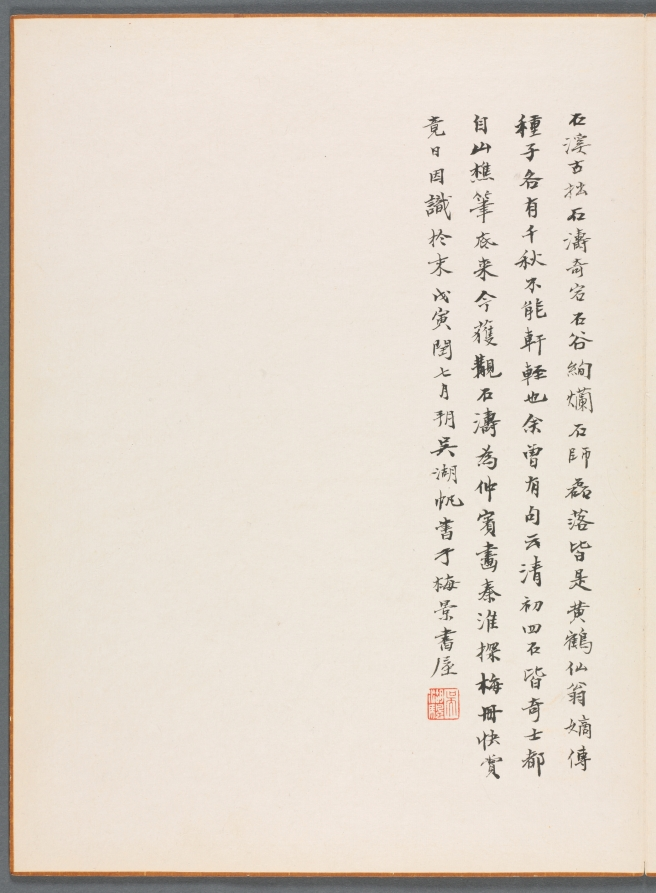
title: Reminiscences of Qinhuai River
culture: China, Qing dynasty (1644-1911)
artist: Shitao (Chinese, 1642–1707)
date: 1642–1707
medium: Album of eight leaves, ink and color on Song paper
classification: Painting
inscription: 大滌尊者濟 [印]原濟; 石濤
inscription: 沿溪四十九迴折，搜盡秦淮六代奇。/ 雪霽東山誰着屐，風高西壑自成詩。/ 應憐孤冷長無伴，其剩槎牙只幾枝。/ 滿地落花春未了，酸心如豆耐人思。/ 仲賓先生以宋紙十幅寄余真州命畫。因憶昔時秦淮探梅聚首之地，寫此就教。清湘石濤濟道人。[印]原濟; 石濤.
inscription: 2 colophons and 15 additional seals: 1 colophon, dated 1937, and 1 seal of Wu Huayuan 吳華源 (1893–1972); 1 colophon, dated 1938, and 2 seals of Wu Hufan 吳湖帆 (1894–1968); 1 seal of C. C. Wang 王季遷 (1907–2003); 11 seals unidentified.